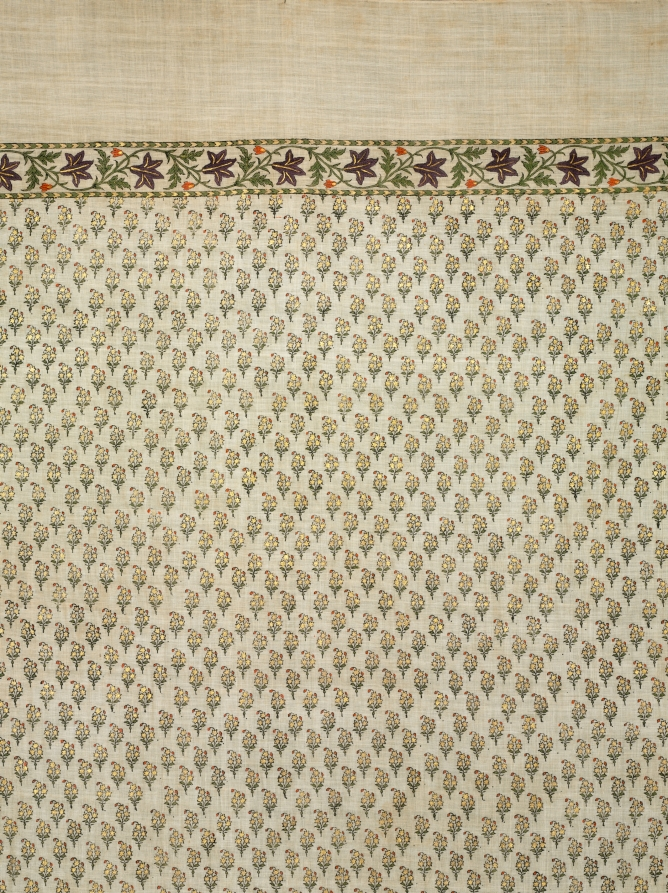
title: Fragment of a Turban Cloth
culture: India, Rajasthan, Mughal period, early 19th Century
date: 1800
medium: cotton muslin (loom width), undyed, block printed, and overprinted with gold leaf (varak)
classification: Textile